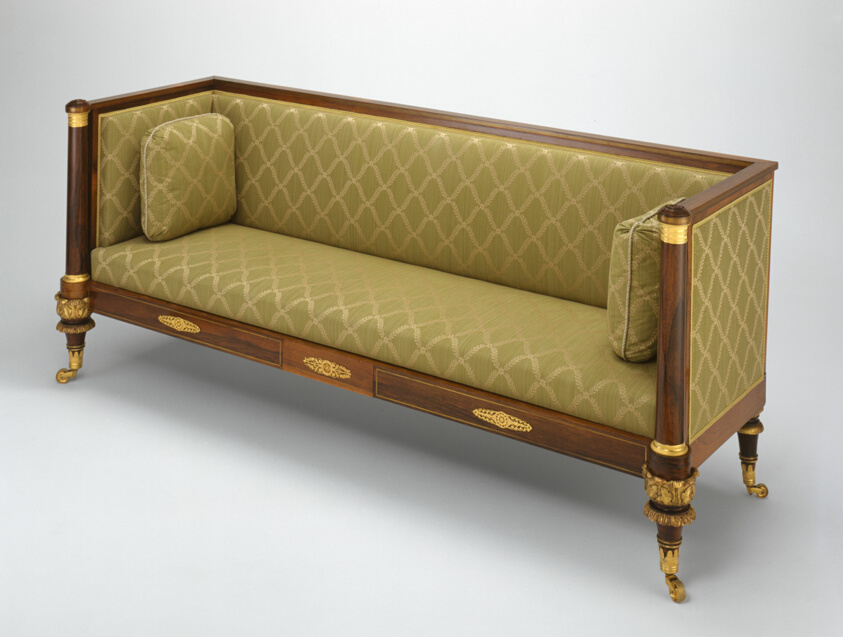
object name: Furniture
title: Box Sofa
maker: Attributed to Duncan Phyfe; American, born Scotland, 1768–1854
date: c. 1820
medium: Rosewood and gilded wood, with ormolu mounts, die-stamped brass inlay inset with rosewood, brass stringing, gilt-brass castors, and upholstery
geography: New York City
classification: seating; furniture; american decorative arts; american arts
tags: furniture